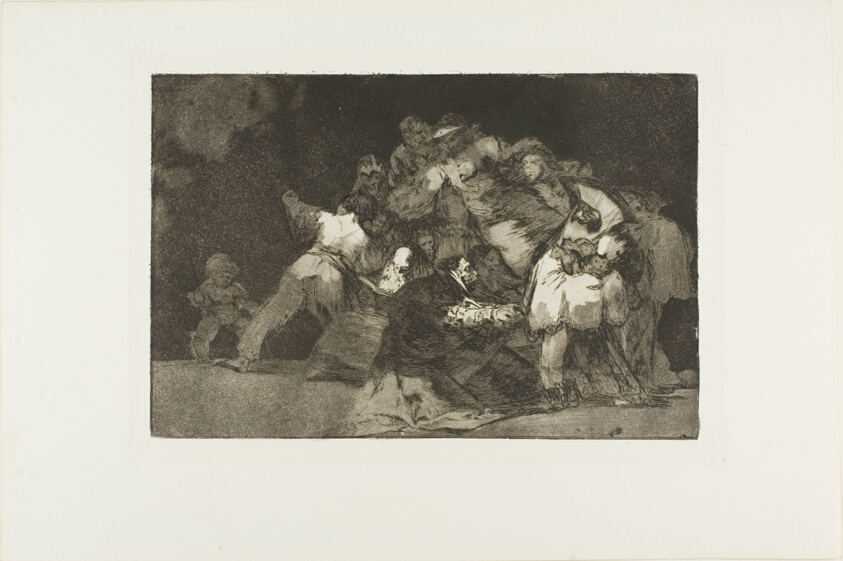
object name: Print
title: General Folly, plate nine from The Proverbs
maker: Francisco José de Goya y Lucientes (Spanish, 1746-1828)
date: 1815/24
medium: Etching and burnished aquatint on ivory wove paper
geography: Spain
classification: etching; print; prints and drawing